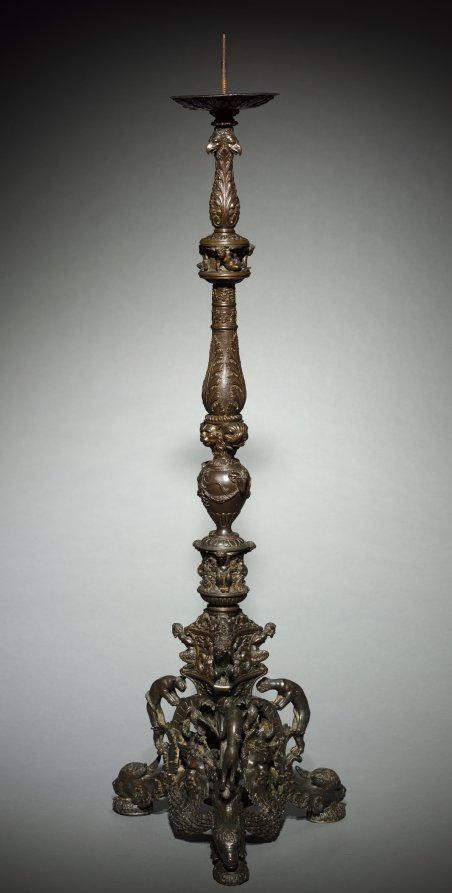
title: Paschal Candlestick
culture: Northern Italy, possibly Padua, 16th century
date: c. 1525–1550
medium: bronze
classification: Sculpture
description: In Roman Catholic practice, a large candlestick holds the Paschal Candle, blessed and lit for the first time on Easter eve, then used on significant occasions throughout the year. Despite its religious function, the decorations here are entirely secular-ranging from panthers and bound satyrs to the heads of raptors and goats. These elements derive from ancient Roman sculpture and were especially popular among intellectuals in northern Italy, who were actively exploring connections among pagan traditions, ancient philosophy, and Christianity.